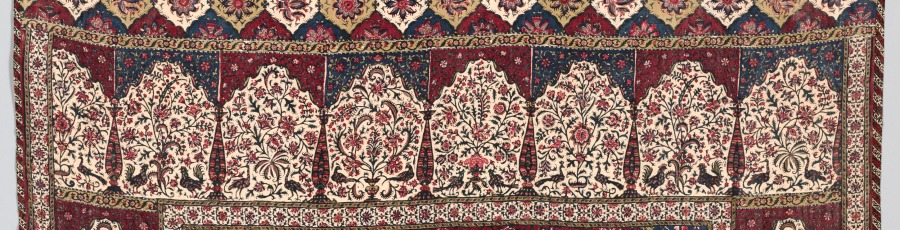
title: Chintz door curtain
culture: Iran, Isfahan, Qajar period (1779–1925)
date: 1800s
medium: Cotton: plain weave; chintz; hand drawing and block printing: bleach, mordant, and dye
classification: Textile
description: Lightweight white cotton cloth was transformed into this beautiful chintz, admired for its vibrant and durable colors, stunning pattern, fine quality, and rarity. Peacocks and a variety of birds appear amid vines with fanciful blossoms in the niche field and main border. Striking end borders feature blossoms in leaf-outlined diamonds on alternating ground colors of white, mustard, red, and blue. The complex chintz technique involving hand drawing, block printing, bleach, mordant, and dyes was developed in India. By the 1600s and 1700s, chintz was designed to target European and Asian markets and often featured large tree-of-life patterns. Chintz was also made in Iran by the 1400s, but this rare door curtain from the 1800s is among the oldest known examples.